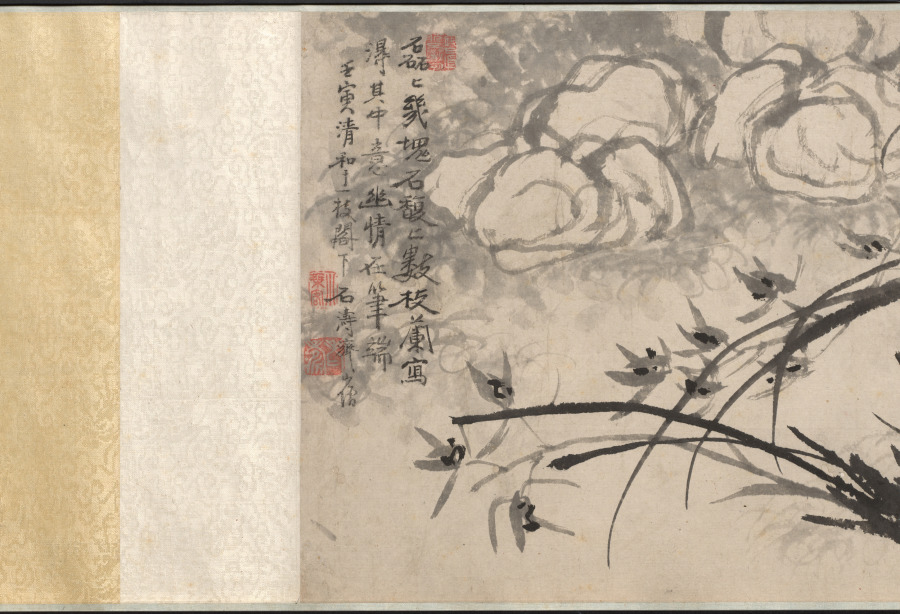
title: Rocks, Orchid, and Bamboo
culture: China, Qing dynasty (1644-1911)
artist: Shitao (Chinese, 1642–1707)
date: 1662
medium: handscroll; ink on paper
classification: Painting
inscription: Title colophon in four characters with signature and two seals on gold-flecked paper.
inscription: Artist's signature, inscription (with date of 1662), five seals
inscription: Colophon with two seals.